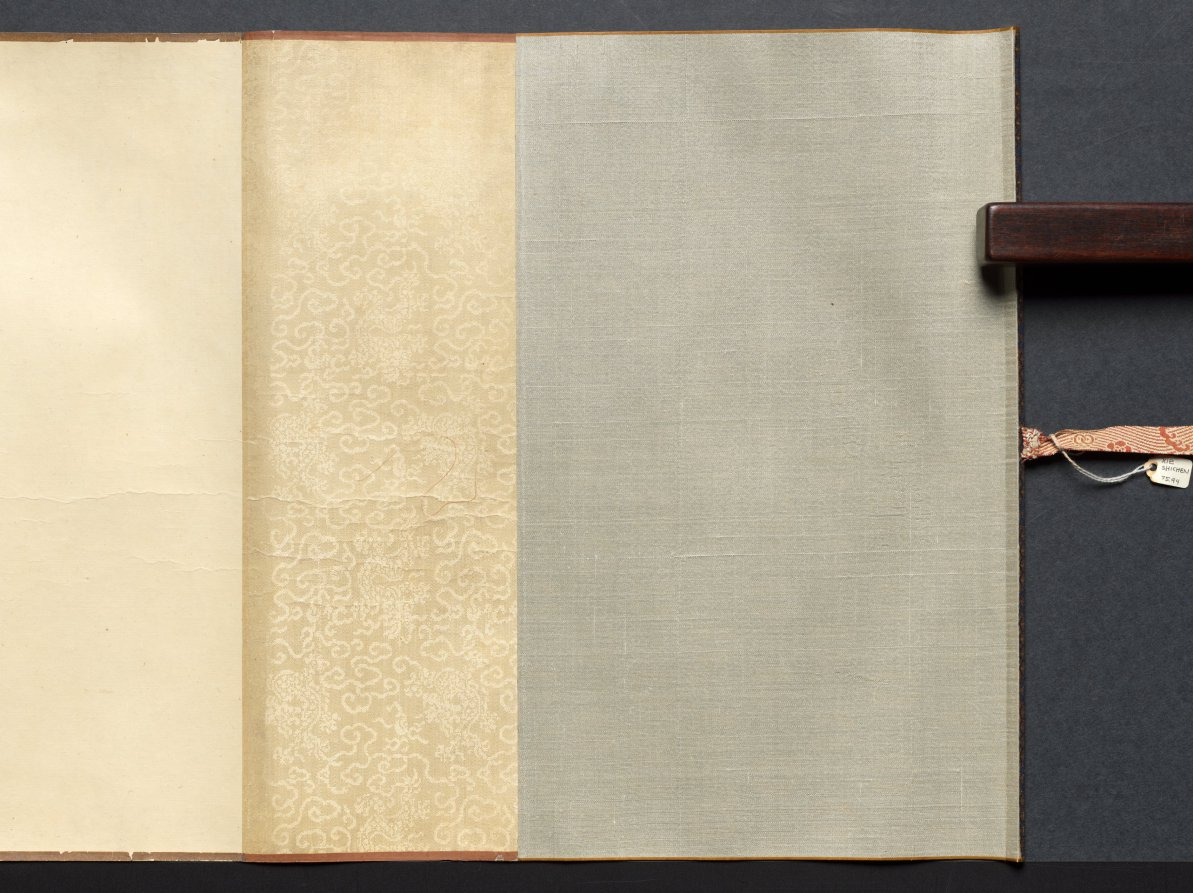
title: Returning to the Village in a Rainstorm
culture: China, Ming dynasty (1368–1644)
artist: Xie Shichen (Chinese, 1487–after 1567)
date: 1530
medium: Handscroll; ink and light color on silk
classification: Painting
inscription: 風雨歸村圖 嘉靖庚寅秋日樗仙謝時臣. [印] 謝時臣印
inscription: 3 additional seals unidentified.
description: This scroll depicts a wind- and rainswept landscape with figures in the countryside struggling against a late summer monsoon rainstorm. Such weather was familiar to residents of the lower Yangzi delta. Xie Shichen spent most of his life in the Suzhou area. Details of his career are scant, but his surviving works suggest that he made his living as a professional painter. This painting conveys drama and anecdotal observations, characteristic of Zhe school paintings, such as the one by Lü Wenying, CMA 1970.76.